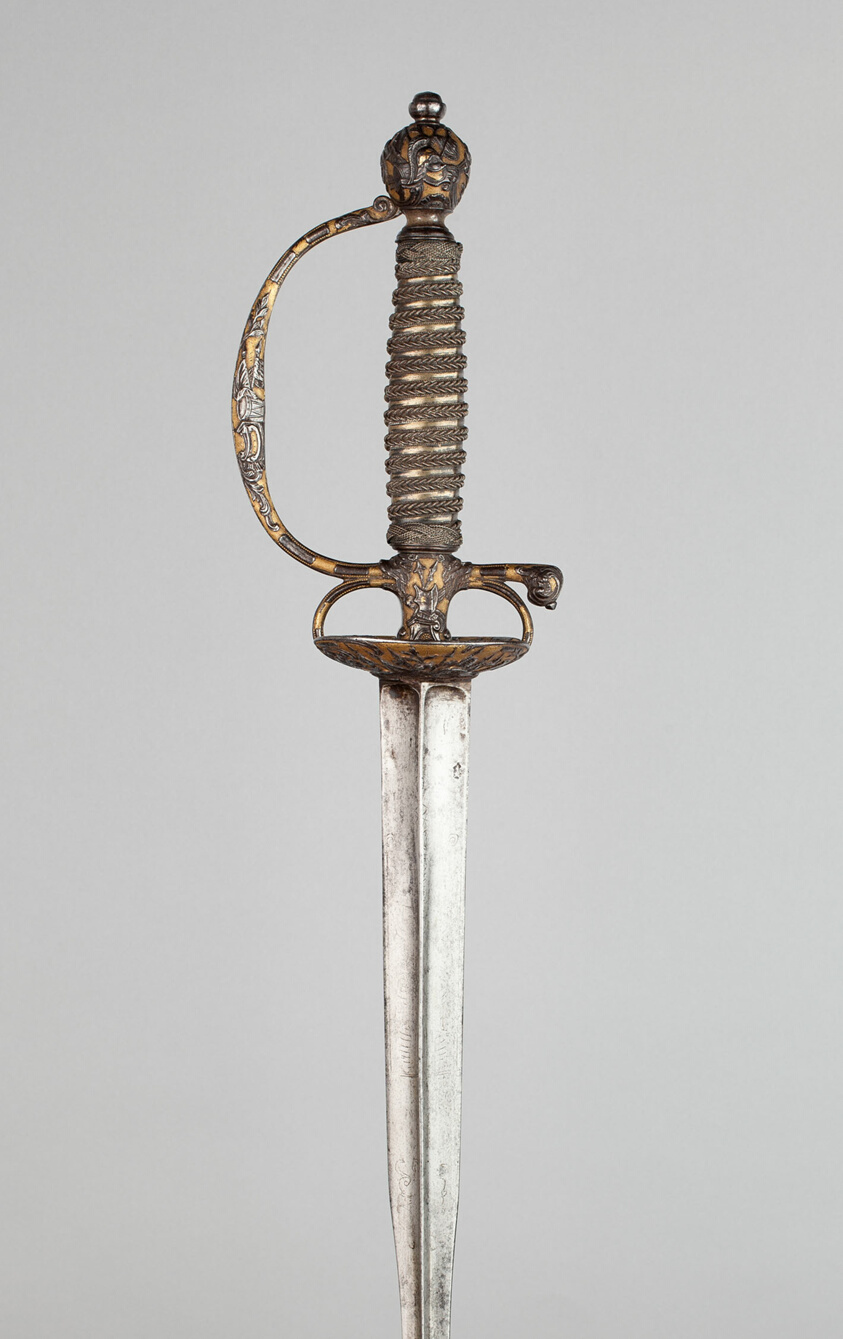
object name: Arms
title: Smallsword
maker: French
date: 1740/50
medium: Steel, gilding, silver, and wood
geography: France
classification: edged weapon-sword; arms; arms and armor